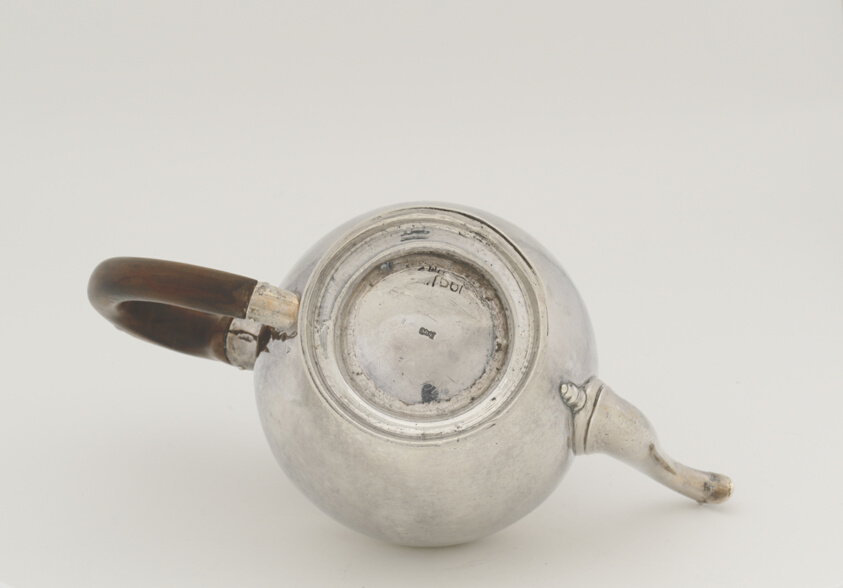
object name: Metalwork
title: Teapot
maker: Jacob Hurd; American, 1702/03–1758; Boston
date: 1740–55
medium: Silver and walnut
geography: Boston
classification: teapot; silver; american decorative arts; american arts; decorative arts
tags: dining, drinking